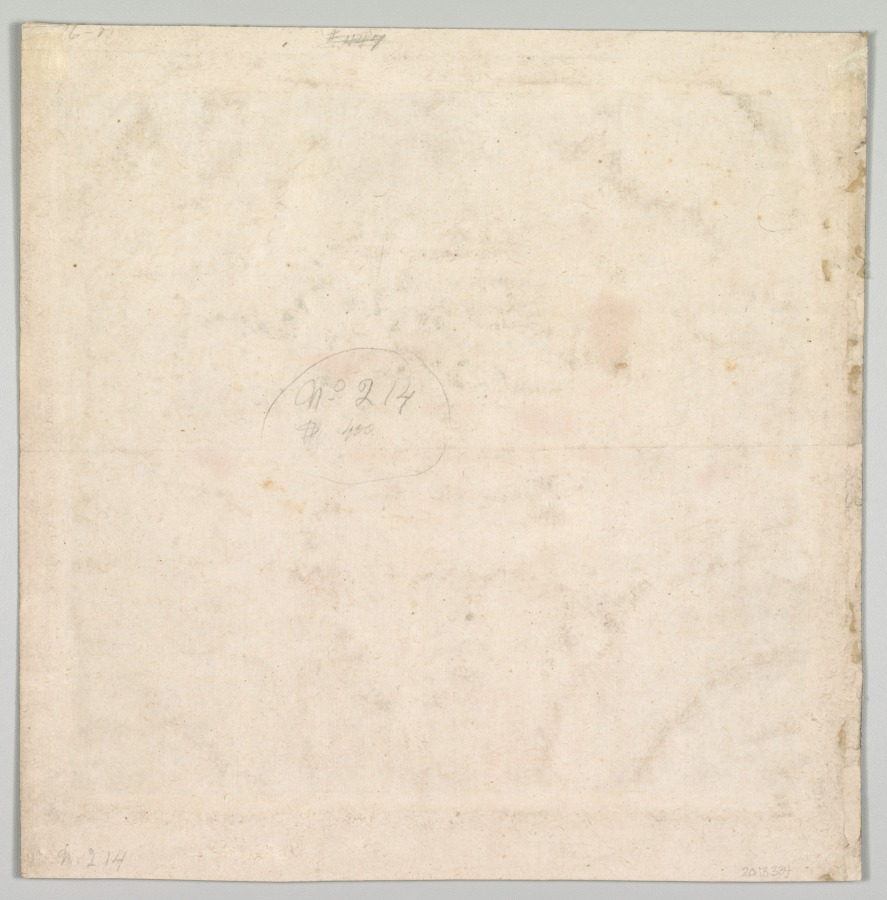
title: Husain Ali Khan Entertaining His Brothers (The Sayyid Brothers)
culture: India, Mughal Dynasty (1526-1756)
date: c. 1712–19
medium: Gum tempera, ink, and gold on paper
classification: Painting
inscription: Persian inscription at bottom, in nasta‘liq script: Portraits of Nawab Husayn-Ali Khan and Abdullah Khan and Najm al-Din Ali Khan and Fakhr al-Din Ali Khan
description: The shrewd imperial oligarch smoking the hookah and his brothers ran the Mughal government after the death of Emperor Alamgir in 1707 until the rise of Emperor Muhammad Shah in 1719. They were ruthless, self-serving kingmakers who caused the assassinations and accessions of six different members of the royal family to the Mughal throne in Delhi. The two attendants behind him exchange a worried glance, and the rare use of a flat gray sky behind the white marble terrace suggests the artist’s mood about the future strength and prosperity of the empire.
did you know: The man shown smoking a hookah is the Mughal imperial ruler.